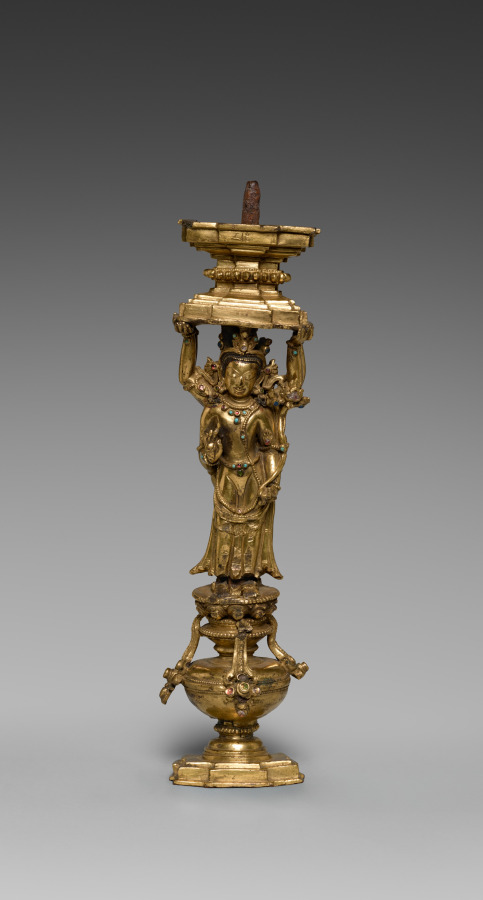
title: Support with Addorsed Figures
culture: Tibet, Densatil Monastery, 15th century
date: 1400s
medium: gilt bronze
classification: Sculpture